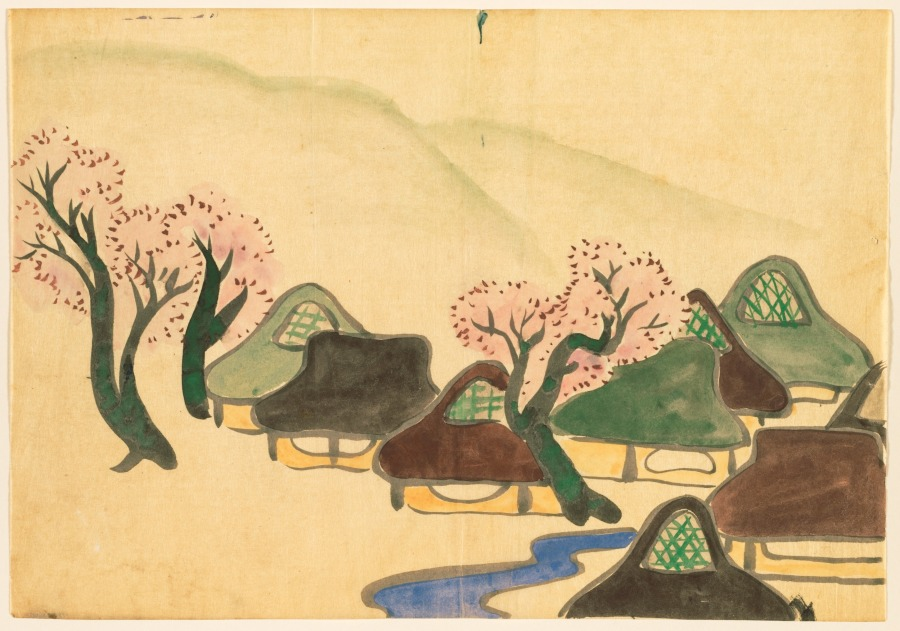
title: Flowers of a Hundred Worlds (Momoyogusa): Farming Village in Spring (Harudenka)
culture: Japan, Meiji period (1868–1912)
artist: Kamisaka Sekka (Japanese, 1866–1942)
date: 1909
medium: ink and color on paper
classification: Drawing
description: Kamisaka Sekka made preparatory drawings for his Flowers of a Hundred Worlds series on tracing paper with ink and color. The freehand sketches are much looser than the finished, printed compositions.